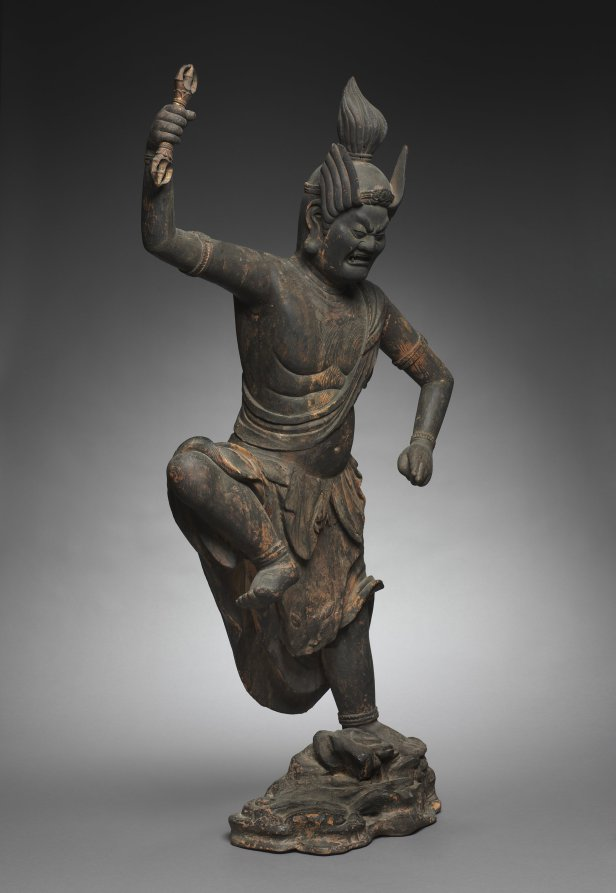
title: Zaō Gongen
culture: Japan, Kamakura period (1185–1333)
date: 1200s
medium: wood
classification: Sculpture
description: Zaō Gongen is the guardian deity of Mount Kinpu in Yoshino south of Nara. Zaō appeared at the behest of En no Gyōja, who prayed for a powerful protector of the mountain. The deity was described as a combined manifestation of the Buddha Shakyamuni, Thousand-Armed Kannon, and Miroku. These three deities were viewed as the past, present, and future protectors of the world. Zaō’s appearance derives from portrayals of fierce Buddhist deities.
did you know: Zaō Gongen wears the pelt of a large feline, the face of which is near his knee.